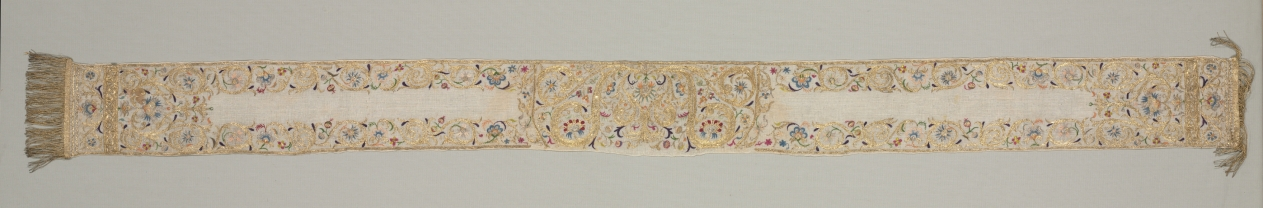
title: Headdress (beniqa)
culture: Africa, North Africa, Algeria, Algerian embroiderer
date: 1800s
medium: Linen, silk, and metal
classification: Embroidery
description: Beniqa were stylish headdresses that women wore when visiting the hammam (steam bath). The linen fabric absorbed the damp from their wet hair. With its gold and silver metal thread, shimmering spangles, and brightly colored threads forming flowers and vines, this beniqa was a ceremonial garment worn for the ritual bath before a Jewish woman’s wedding; it was also part of her dowry. After toweling off her hair, a woman made two braids, which she would then twist into the cap’s fabric and tie on her head, with the gold-fringed ends trailing down.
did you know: Slender gray lines made in pencil or chalk trace out unstitched designs on this elaborate ritual cap.